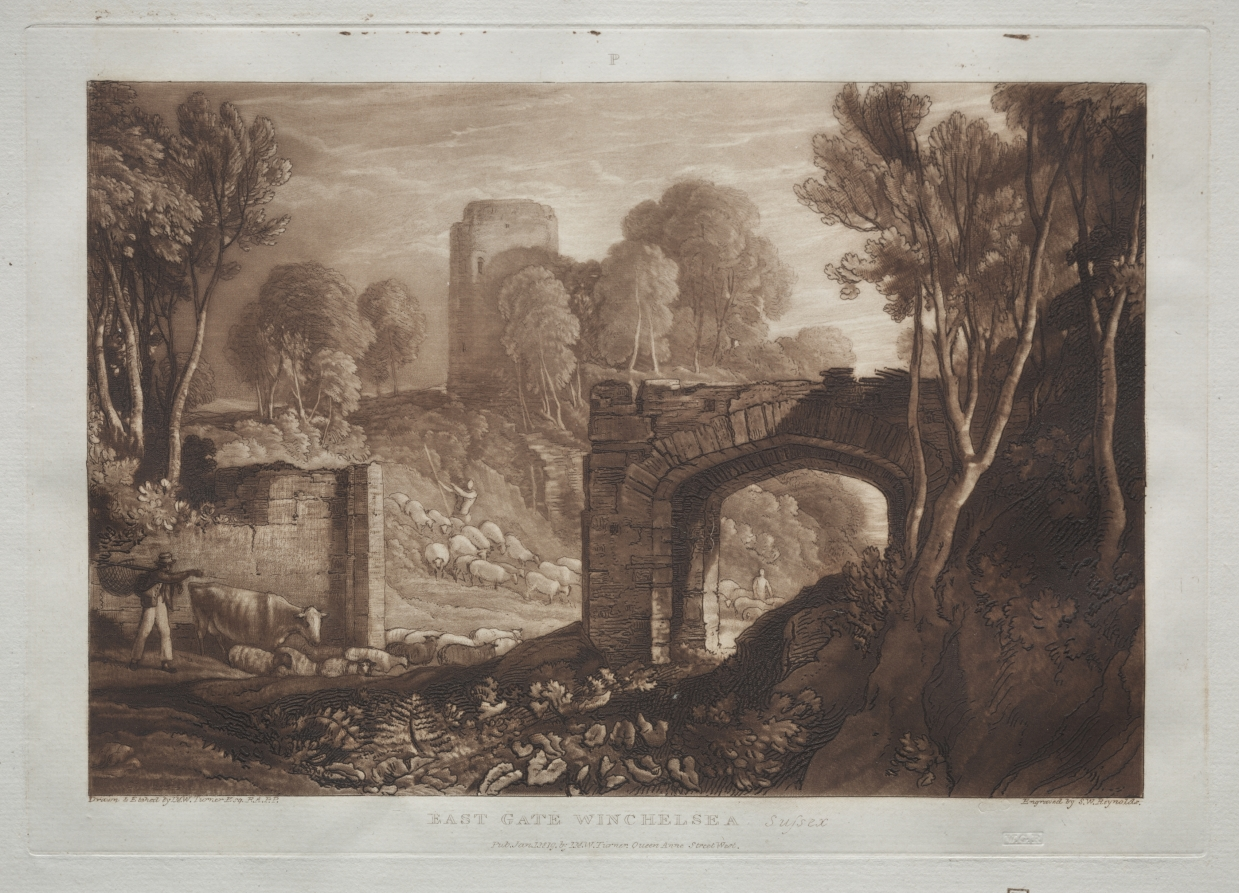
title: Liber Studiorum: East Gate, Winchelsea, Sussex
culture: England, 19th century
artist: Joseph Mallord William Turner (British, 1775–1851)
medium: etching and mezzotint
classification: Print